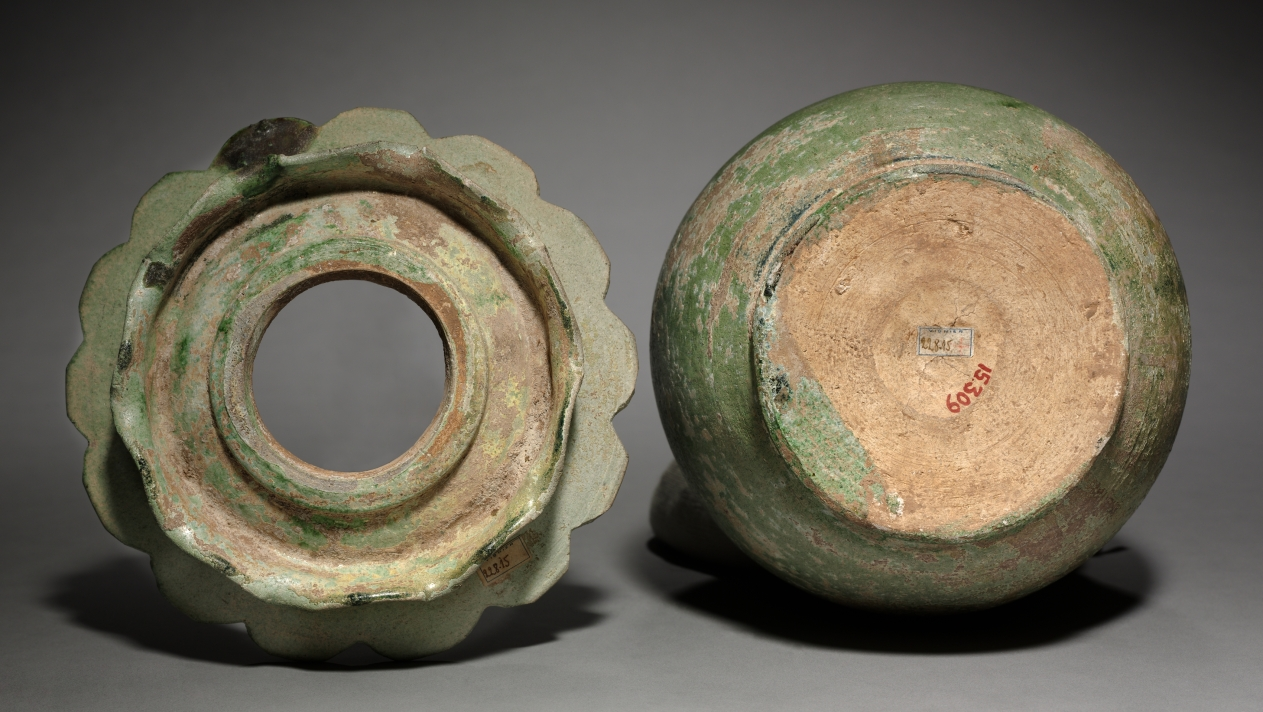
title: Ewer with Corolla Base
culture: China, Manchuria, Liao dynasty (916-1125)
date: 907–1125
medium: pottery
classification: Ceramic